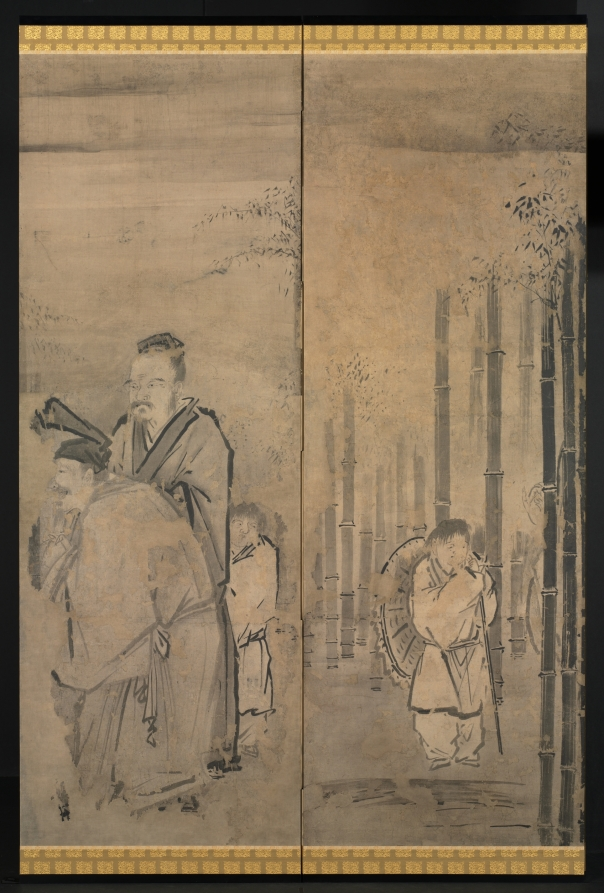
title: Seven Sages of the Bamboo Grove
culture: Japan, Edo period (1615–1868)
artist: Kano Tan’yū (Japanese, 1602–1674)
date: 1600s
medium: pair of six-fold screens; ink on paper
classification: Painting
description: The Kano school was a group of professional artists patronized by the shogun from the late Muromachi period to the Edo period. The group adopted themes of reclusiveness to convey the importance of loyalty to the shogunate. A leader of the Edo Kano school, Kano Tanyu paired Seven Sages of the Bamboo Grove and Four Elders of Mt. Shang to reference a painting of the same theme attributed to Kano Motonobu. Seven Sages of the Bamboo Grove refers to the elites who escaped the social chaos of China’s Wei-Jin period (AD 200s–400s); they fled to a secluded bamboo grove where they could express themselves freely, enjoying pure conversation, music, and wine. The other screen, Four Elders of Mt. Shang, depicts the scholars who left the turbulence of the late Qin dynasty to pursue their scholarly interests in seclusion on Mt. Shang in Shanxi province.